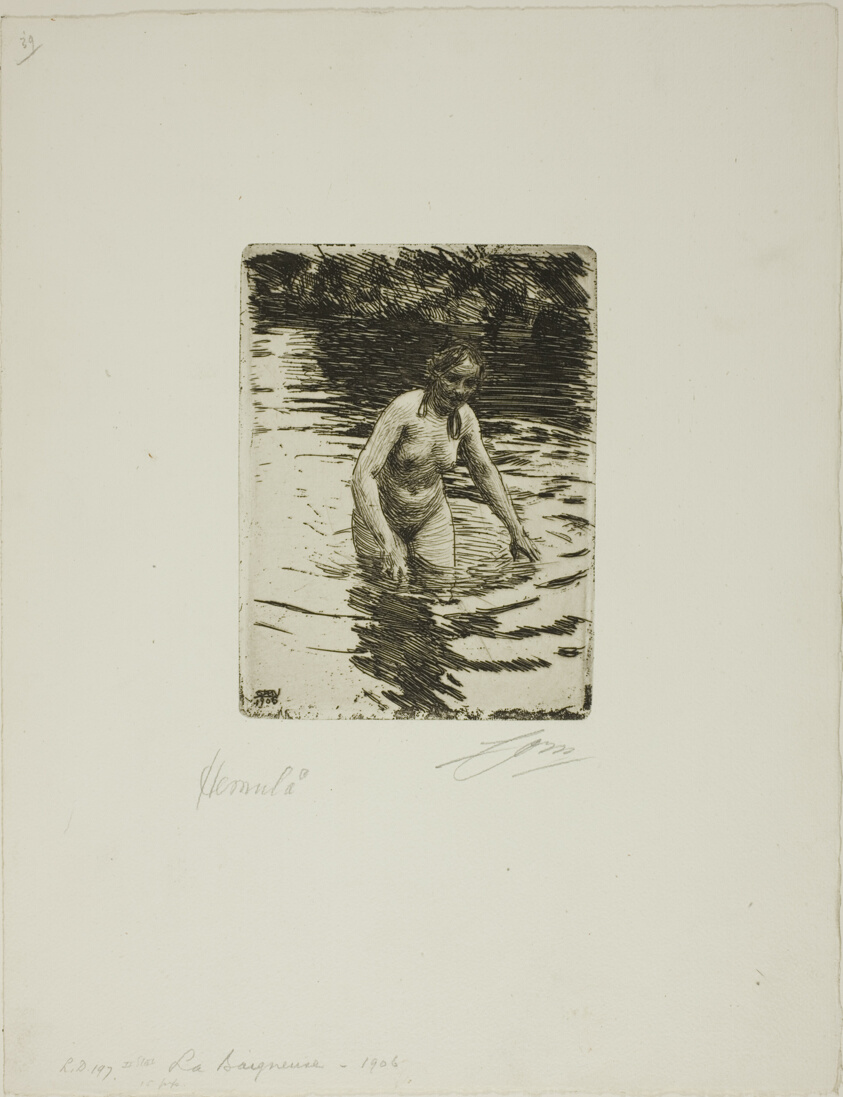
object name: Print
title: Hemulå II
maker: Anders Zorn (Swedish, 1860-1920)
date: 1906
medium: Etching on ivory laid paper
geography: Sweden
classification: etching; print; prints and drawing